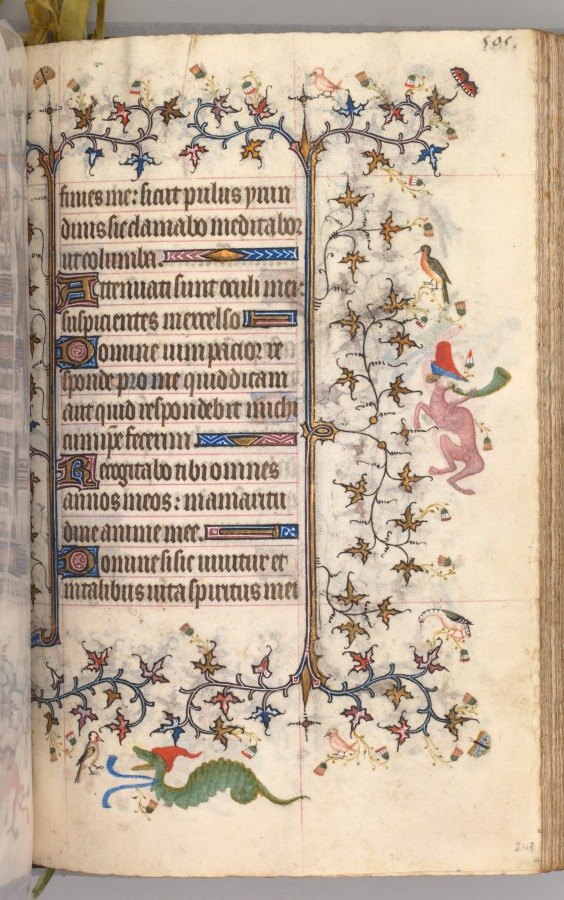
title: Hours of Charles the Noble, King of Navarre (1361-1425): fol. 247r, Text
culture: France, Paris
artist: Master of the Brussels Initials and Associates (French)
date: c. 1405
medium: ink, tempera, and gold on vellum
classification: Bound Volume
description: This precious volume was obviously highly prized by its owner, the French-born King of Navarre, who had his coat of arms painted on no less than twenty folios. Rather than directly commissioning this manuscript from a specific workshop, it seems that Charles the Noble acquired his book of hours -- perhaps ready-made for the luxury market -- while on a trip to Paris in 1404-05. A collaborative effort, six painting styles are evidenced within the pages of this codex, those of two Italians, two Frenchmen, and two Netherlanders. The painter who was responsible for the planning and decoration of the book, and who produced seventeen of the large miniatures, was a Bolognese artist known as the Master of the Brussels Initials. His principal assistant, responsible for most of the borders, was a Florentine who signed his name "Zecho" da Firenze on folio 208 verso.